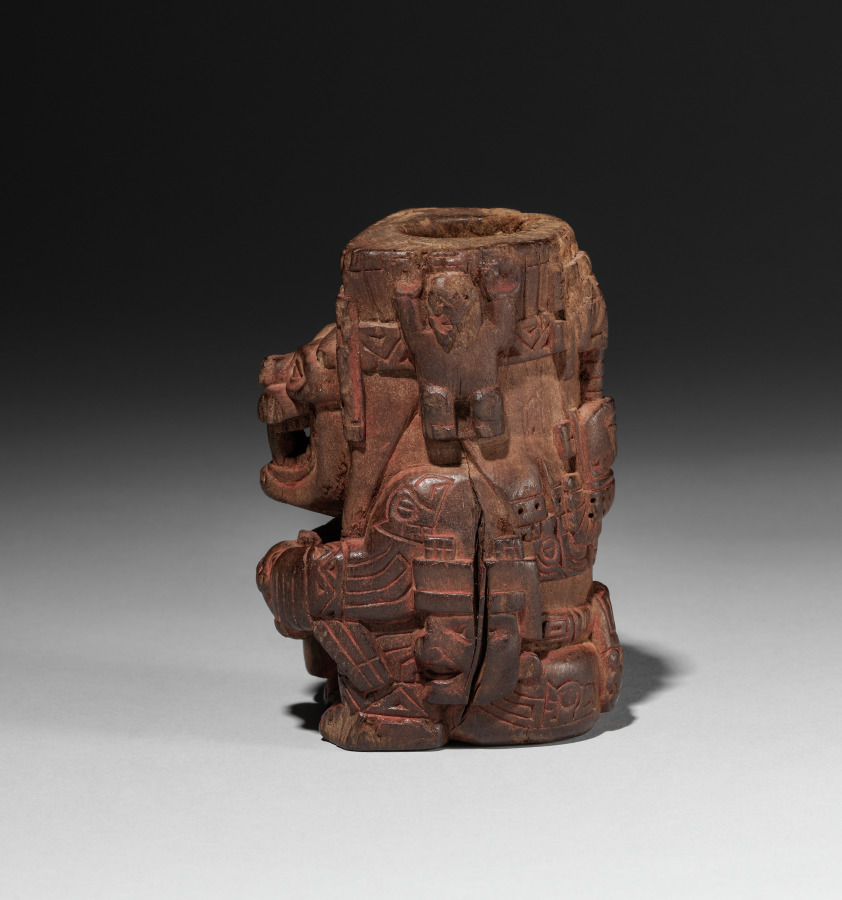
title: Container in the form of a Sacrificer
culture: Peru, Middle Horizon, Wari Culture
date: 770–890 (radiocarbon date, 95% probability)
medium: wood and red pigment (cinnabar)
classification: Wood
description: This container assumes the shape of a magnificent, feline-headed, supernatural sacrificer who draws a knife across the throat of the human it holds in its lap. Severed human heads hang from the feline's belt and dangle by the trachea at the back of its headdress. Sacrifice had a place in Wari religious practice, probably as an unusual and exceptionally precious offering made to entice the benevolence of cosmic forces. Indeed, colonial-period Andean people believed that death was a prerequisite for the renewal of the world.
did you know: Traces of cinnabar, a toxic mercuric sulfide, are visible on the container's surface.